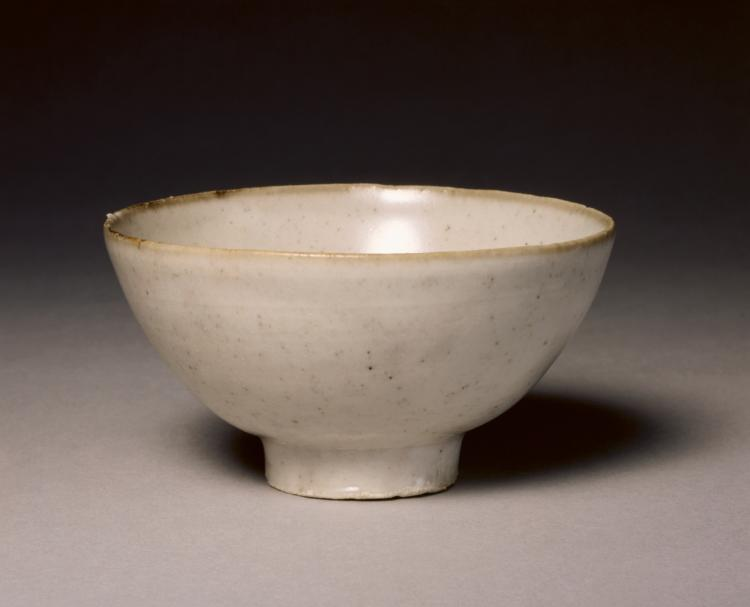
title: Bowl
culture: China, Qing dynasty (1644-1911)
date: c. 1690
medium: porcelain with gray glaze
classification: Ceramic